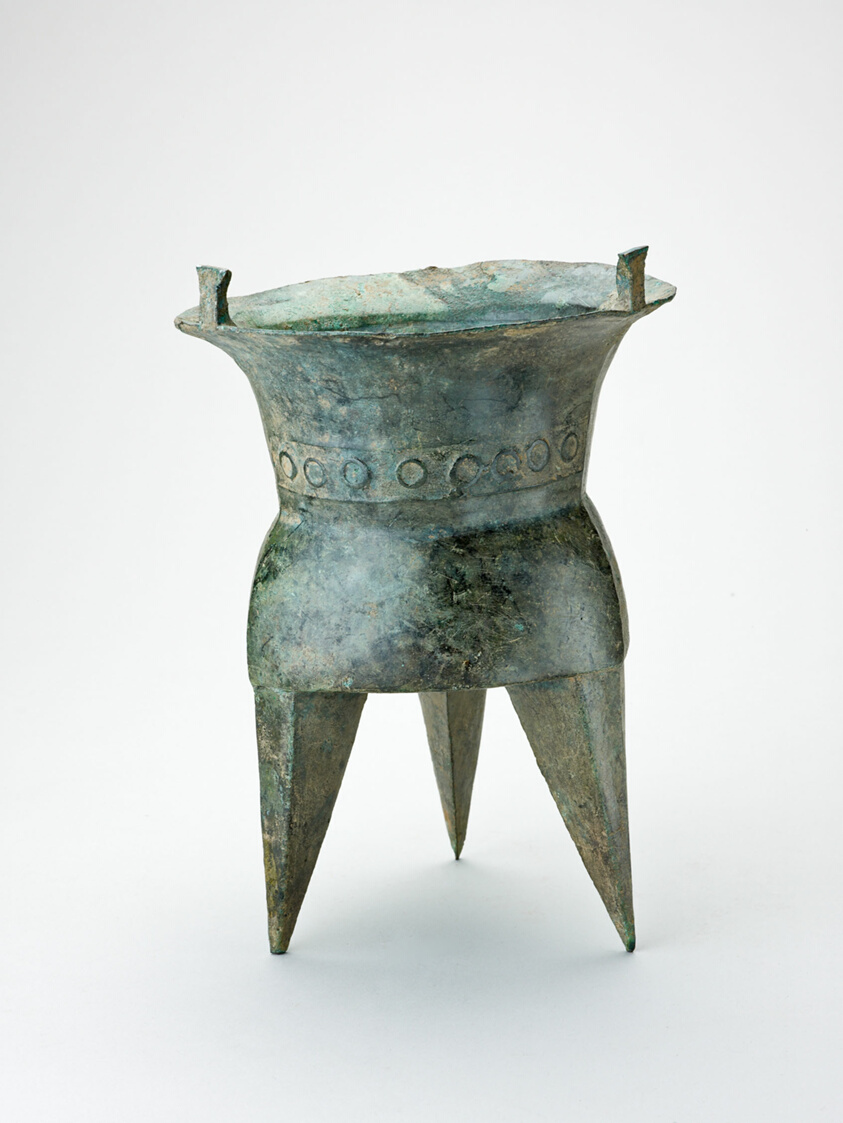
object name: Vessel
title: Goblet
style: Chinese (culture or style)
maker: China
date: Erligang period or Early Shang dynasty, 16th/mid–15th centry BC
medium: Bronze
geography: China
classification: vessel; vessel for serving drinks